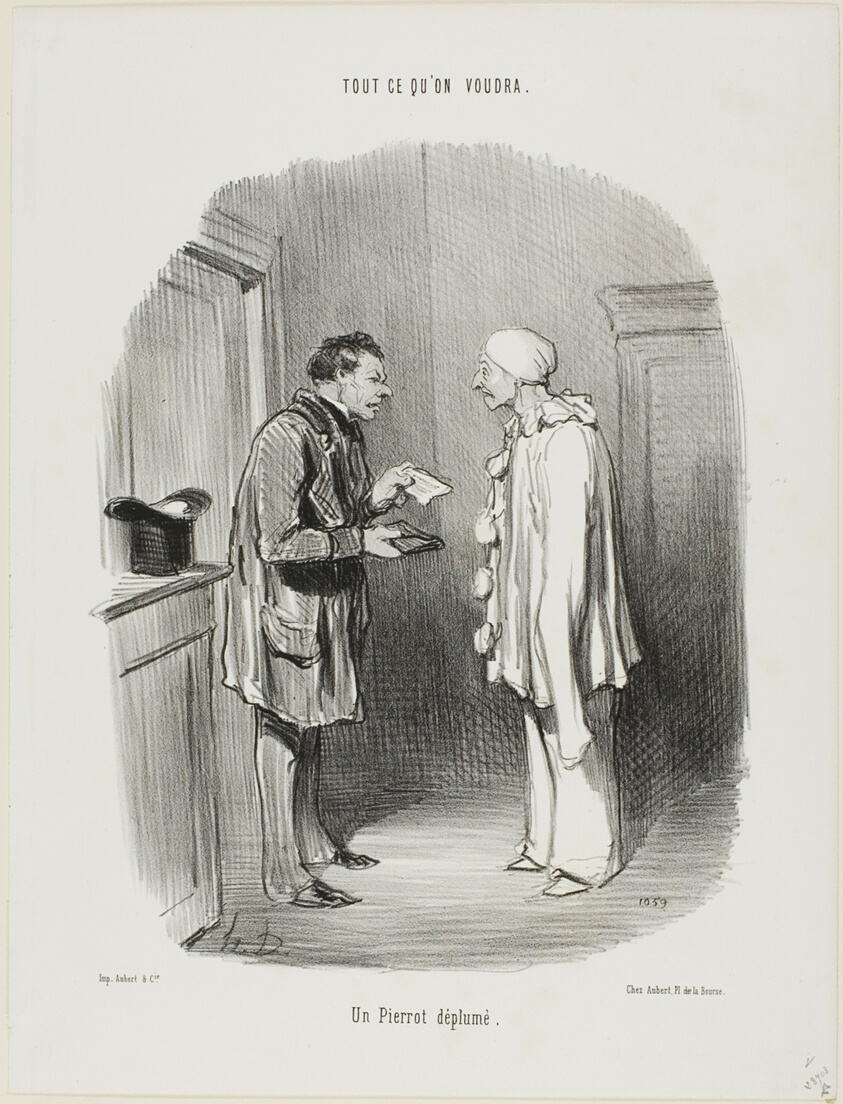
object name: Print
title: A Plucked Pierrot, plate 9 from Tout Ce Qu'on Voudra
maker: Honoré Victorin Daumier; French, 1808-1879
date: 1847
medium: Lithograph in black on white wove paper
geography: France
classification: lithograph; print; prints and drawing